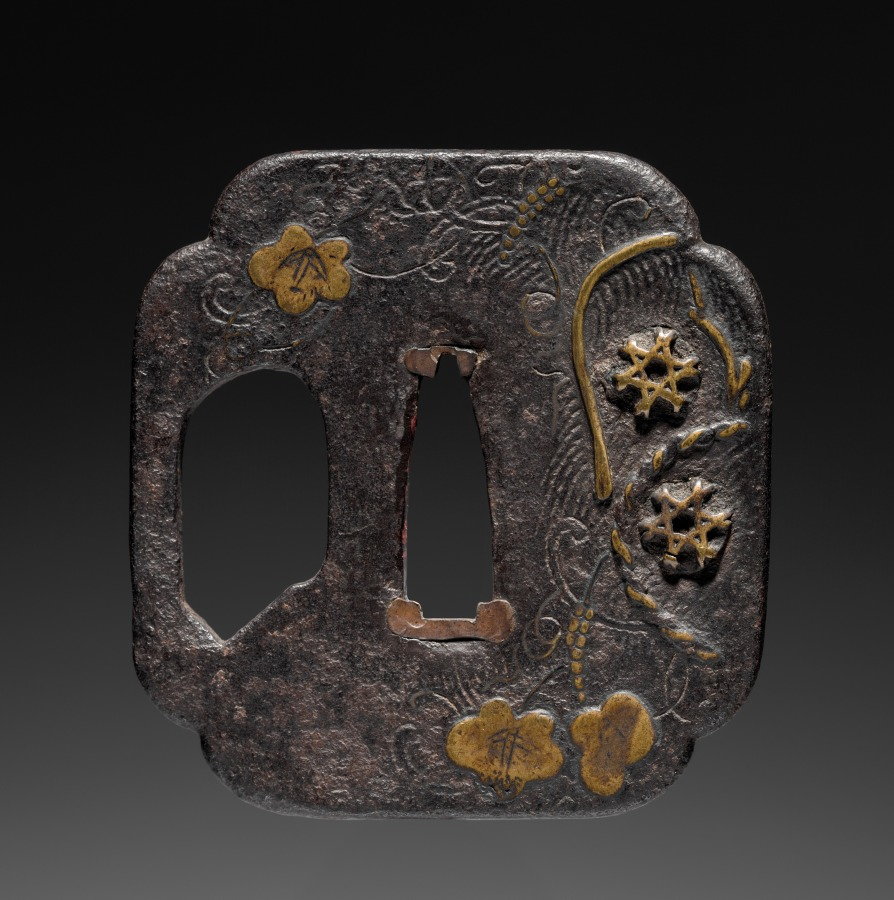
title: Sword Guard (Tsuba)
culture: Japan, possibly Edo period (1615-1868)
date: c. 1615–1868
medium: iron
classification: Arms and Armor